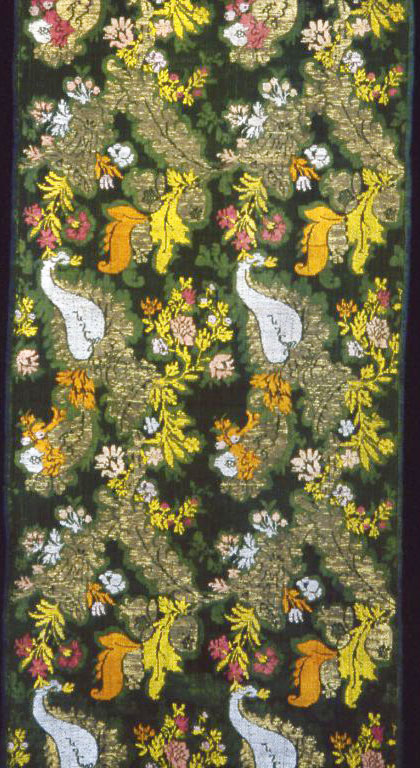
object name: Textile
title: Panel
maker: France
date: Early 18th century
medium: Silk and gilt-metal-strip-wrapped silk, satin damask weave with brocading wefts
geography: France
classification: textile; weaving